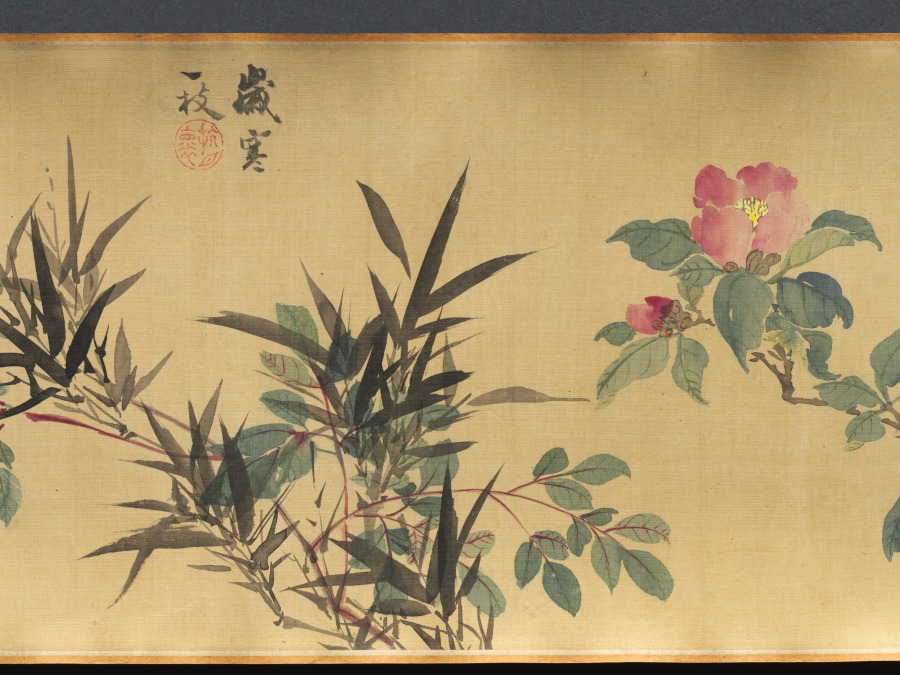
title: Flowers of Four Seasons, with Poems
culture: China, Ming dynasty (1368–1644)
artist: Wang Guxiang (Chinese, 1501–1568)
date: 1531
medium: handscroll; ink and light color on silk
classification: Painting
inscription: Artist's inscription, signature, and 15 seals. Ink Orchids. Sewn as pendants for the man of worth, swaying quiety, fragrance in the valley. [seal] Hsiao-chu ts'un Peony. Wiping his face, the young gentleman Ho [Ho Yen of Wei, Three Kingdoms] appears to have been powdered. His previous life was the perfume-stealing Han Shou [of Chin, 265–419 CE], the fragrance still lingers. [seal] Ts'un-wu chai. Flowering Crab Apple, New Bamboo. Shao-lin [Du Fu, 712–770] had to put down his brush. [Flowering Crab Apple]. Yü-k'o [Wen T'ung, d. 1079) in vain wrote poems about [Bamboo]. [seal] Yu-shih. Lotus Flowers. When she turns her head, half-hidden by a fan, and casts a glance, all the beautiful women become colorless. [seal] K'ang yüeh huai. Loquat. Ripeness in summer. [seal] Lu-chih. Pomegranate Flower. Whenever I remember you I will send my thoughts, but where have you gone--the [skirt] of pomegranate red? [seal] Wu-ho Sheng. Day Lily. Plant the day lily to forget sorrow. [seal] Yu-shih. Chrysanthemum. The untrammelled joy at the eastern fence. [seal] Lu-chih. Begonia. Comparing it to the beauties of Spring, and spreading them out as trimming for the stone steps. [seal] Yu-shih. Hibiscus. In recent years I have always enjoyed looking at flowers; instead of dark red I preferred pink ones. [seal] Jen-sheng i-lou. Narcissus, Camellia. The jade girdle left behind at Lo River. [Narcissus]. The precious pearls glitter before Spring. [Camellia]. [seal] Lu-chih. Heavenly Bamboo (Nandina domestica). A single branch in the wintry season. [seal] K'ang yüeh huai. Plum. Fragrant snow in the Lo-fou Mountains. [seal] Ts'un-wu chai. In the eleventh lunar month of the hsin-mao year of the Jiaqing era [1531], [I] imitated the boneless style of Yüan masters in sketching from life. Guxiang [seals] Yu-shih; Lu-chih. Translated by Wai-kam Ho/Lingyun Shih Liu (1980)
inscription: 2 colophons and 23 additional seals: 1 colophon dated 1632, and 2 seals of Li Jih-hua [Li Rihua] 李日華 (1565–1635); 1 colophon and 2 seals of Xiang Shengmo 項聖謨 (1597–1658); 3 seals of Liang Qingbiao 梁清標 (1620–1691); 6 seals of the Jiaqing 嘉慶 emperor (r. 1796–1820); 9 seals of Ch'eng Ch'i [Cheng Qi] 程琦 (1911–1988)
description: In this painting, flowers are loosely arranged by the seasons: narcissus and peony represent early spring; yellow loquat and lotus, summer; chrysanthemum, autumn; and the plum and evergreen bamboo, winter. The artist added to each flower a poetic line of calligraphy associating each plant with a historic or legendary figure. For example, the chrysanthemum, along with the line “The untrammeled joy at the eastern fence,” refers to the poet Tao Yuanming (died AD 427) who enjoyed chrysanthemums at the eastern fence in his garden. The scroll illustrates Wang Guxiang’s mastery of free brushwork, combining light monochrome ink with transparent colors. In his inscription, Wang says he used the “boneless” style without outlines as developed during the Yuan dynasty (1279–1368). Wang was a native of Changzhou, a city in southeast China known for its rich flora and fauna, and flower-and-bird painting tradition.